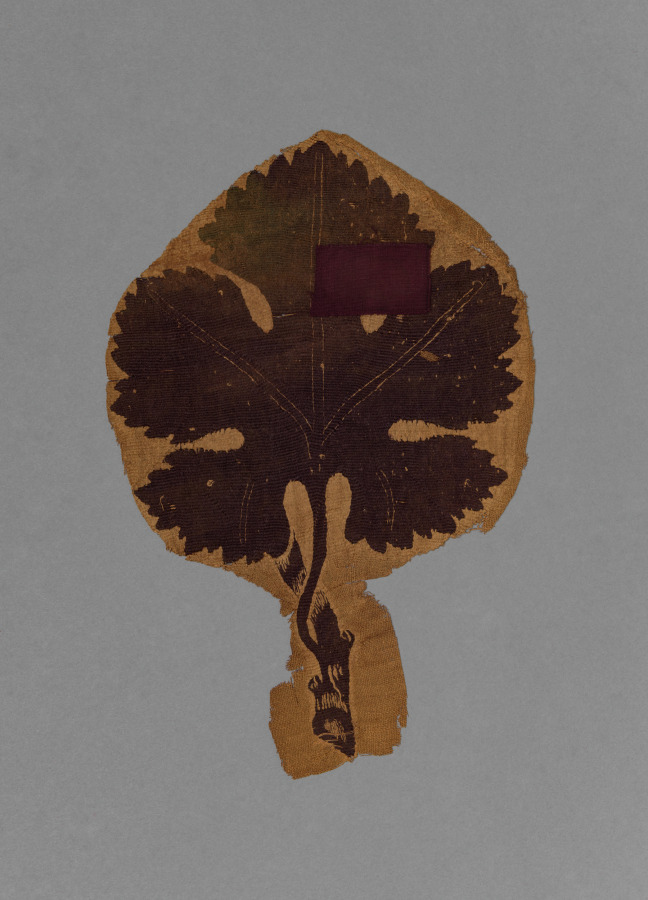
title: Grape Leaf from a Curtain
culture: Egypt, Byzantine period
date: 400s-500s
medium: weft-faced plain weave with tapestry weave and supplementary weft wrapping; undyed linen and dyed wool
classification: Textile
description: This deep-purple grape leaf once decorated the plain linen ground of a curtain. It probably refers to Dionysus, the classical god of wine, whose cult was popular in Egypt through the 6th century.